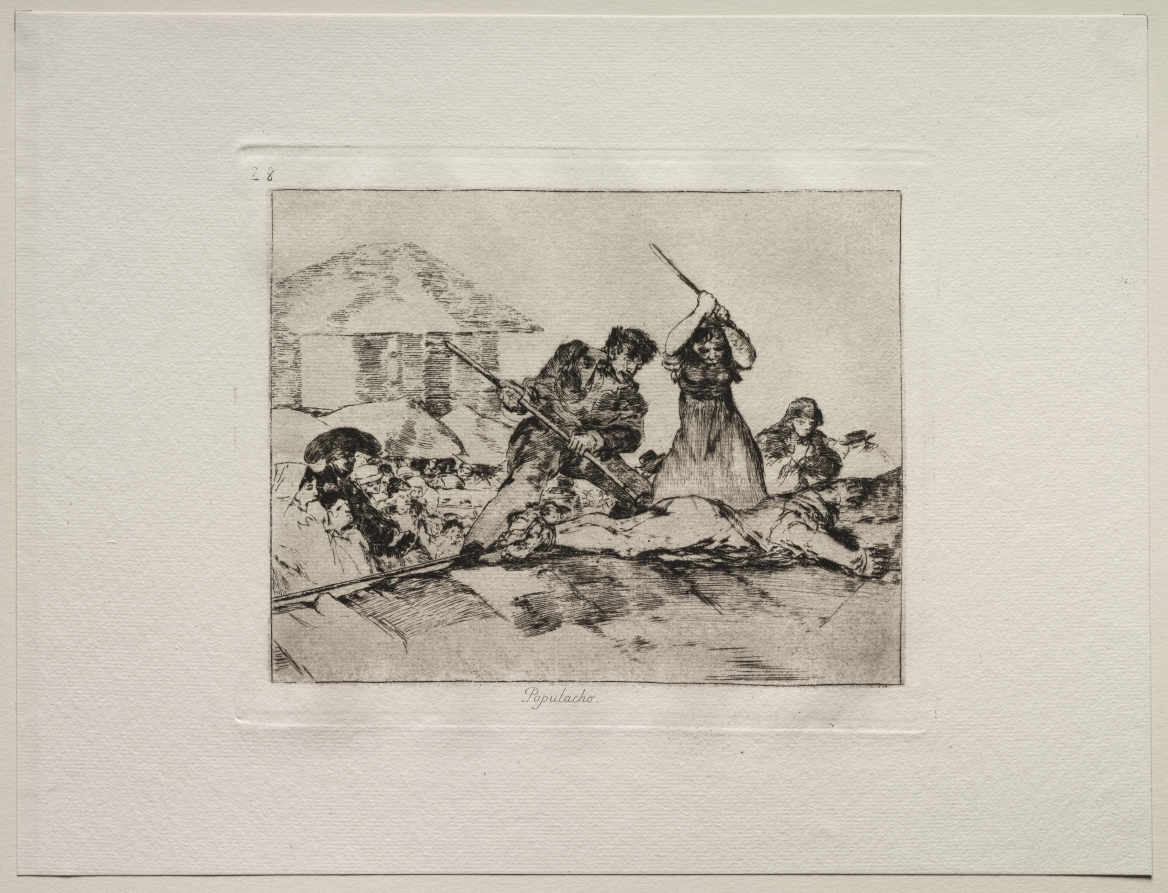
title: The Horrors of War: Rabble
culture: Spain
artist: Francisco de Goya (Spanish, 1746–1828)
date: 1810–20, published 1863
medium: etching and aquatint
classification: Print